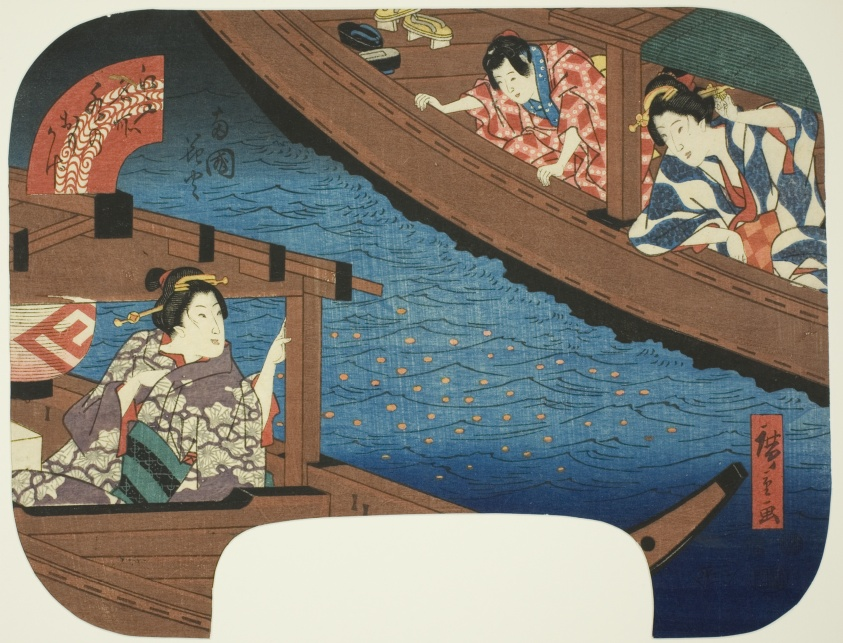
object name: Print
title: Fireworks at Ryogoku (Ryogoku hanabi), from the series "Reflections on Water at Famous Places in Edo (Edo meisho mizu no omokage)"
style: Japanese (culture or style)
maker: Utagawa Hiroshige 歌川 広重; Japanese, 1797-1858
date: 1852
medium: Color woodblock print; uchiwa-e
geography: Japan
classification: woodblock print; print; asian art